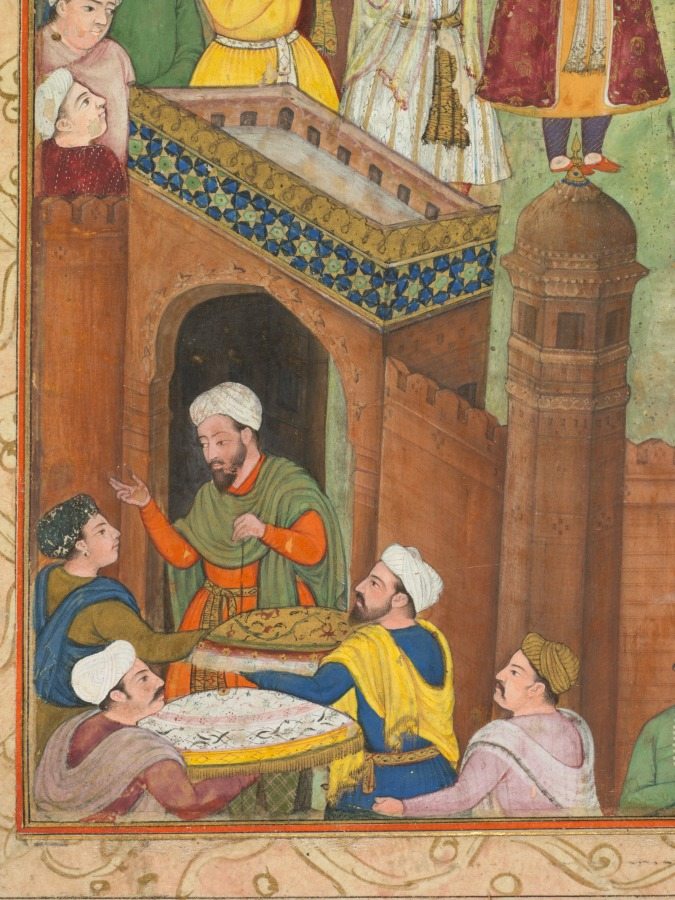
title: Babur receives booty and Humayun’s salute after the victory over Sultan Ibrahim in 1526, from an Akbar-nama (Book of Akbar) of Abu’l Fazl (Indian, 1551–1602)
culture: Mughal India, court of Akbar (reigned 1556–1605)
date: c. 1596–1597 or 1604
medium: Gum tempera and gold on paper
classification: Painting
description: The first Mughal emperor Babur sits enthroned as men bring gifts and sacks of tribute to mark a successful expansion of his territories. Emblematic of his role in leading the victory, his son Humayun wears a wine-and-gold robe of honor despite the Delhi heat in late April. Marking the royal space are a carpet and canopy painted with a lapis lazuli ground. The floral vine motif called arabesque swirls around a central lobed medallion. These delicate patterns are inspired from Persian manuscript illuminations. Contemporary historians describe awnings of gold embroidery, brocade, and velvet along with colorful carpets resembling a beautiful flower bed.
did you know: A clerk records the amount of tribute that Babur received from conquered kings.